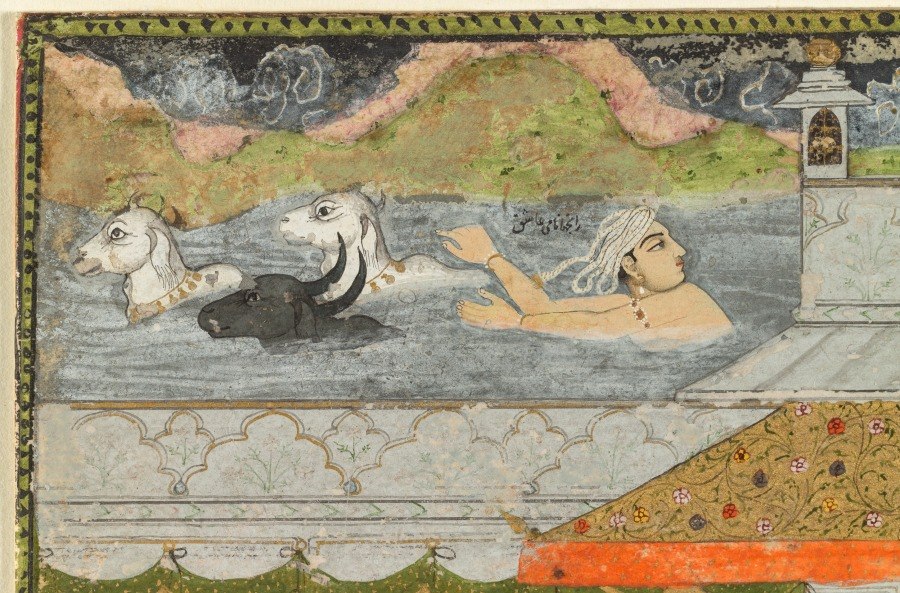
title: Lovers and beloveds: A composite of scenes from Persian, Urdu, and Sanskrit literature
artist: Chitarman II (Indian, c. 1680–с. 1750)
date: c. 1735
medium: Gum tempera and gold on paper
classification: Painting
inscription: Persian inscriptions throughout, in nasta‘liq script: Top left: The celebrated lover Ranjha; Top right, above awning: The notable ladies of the city falling into a swoon having caught sight of Joseph’s beauteous countenance; Top center, on pillar beneath canopy: The celebrated lover Vamiq; On another pillar, behind the woman’s head: The celebrated beloved ‘Azra; Upper left, on pillar: King Nala, the lover; Central figure with halo: The coming from the prison and sitting [in state] of the Lord Joseph the Prophet, with the women of the town cutting the palms of their hands and falling down unconscious; Left of center: [. . . cutting palms . . . wine cups fell from their hands . . . state of wonderment . . .]; Central pavilion at left: Sassi, the beloved the lover [Punnun]; Below central figure of Joseph: The stream of milk Shirin the beloved, weeping The death of Farhad, the lover; Lower right, in front of bearded man: Hafiz of Shiraz; Below his decanter: The stick of candy [referring to the woman with whom, according to popular lore, Hafiz was supposed to have fallen in love as a youth]; Behind the pavilion at right: Bride descending into a grave . . .; On the white railing to the left: Khwaja Bu Ali . . .; Bottom left: Queen Padmavati, the beloved, King Ratnasena, the lover; Bottom right: Majnun, the lover; On page held by Majnun: Say, “He is Allah, who is One, Allah the eternal refuge. He neither begets nor is born, Nor is there to Him any equivalent.” [Qur'an, chapter 112]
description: The figure of Joseph, identified by his halo, sits in the center near the top of this painting of heroes and heroines of ten different Persian, Urdu, and Sanskrit romances. The depicted scene occurs after Joseph has been purchased by Zulaykha in Egypt. Zulaykha, wishing to show him off to her friends and acquaintances, invites them to her home where she supplies oranges and knives. When the women see Joseph, they all are so distracted by his divine beauty that they accidentally cut their hands while peeling their oranges, but remain mesmerized by his appearance. The dramatic scene in the center is from the Persian romance of Khusrau and Shirin, in which Farhad, a stonecutter who loved Shirin, threw himself to his death from a mountaintop after hearing news of Shirin’s death, falsely sent to him from his rival Khusrau. The emaciated Majnun is in the lower right corner. Every vignette has been identified with a tiny Persian inscription.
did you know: Below the bearded poet Hafiz is the woman he loved; her name was Stick of Candy.